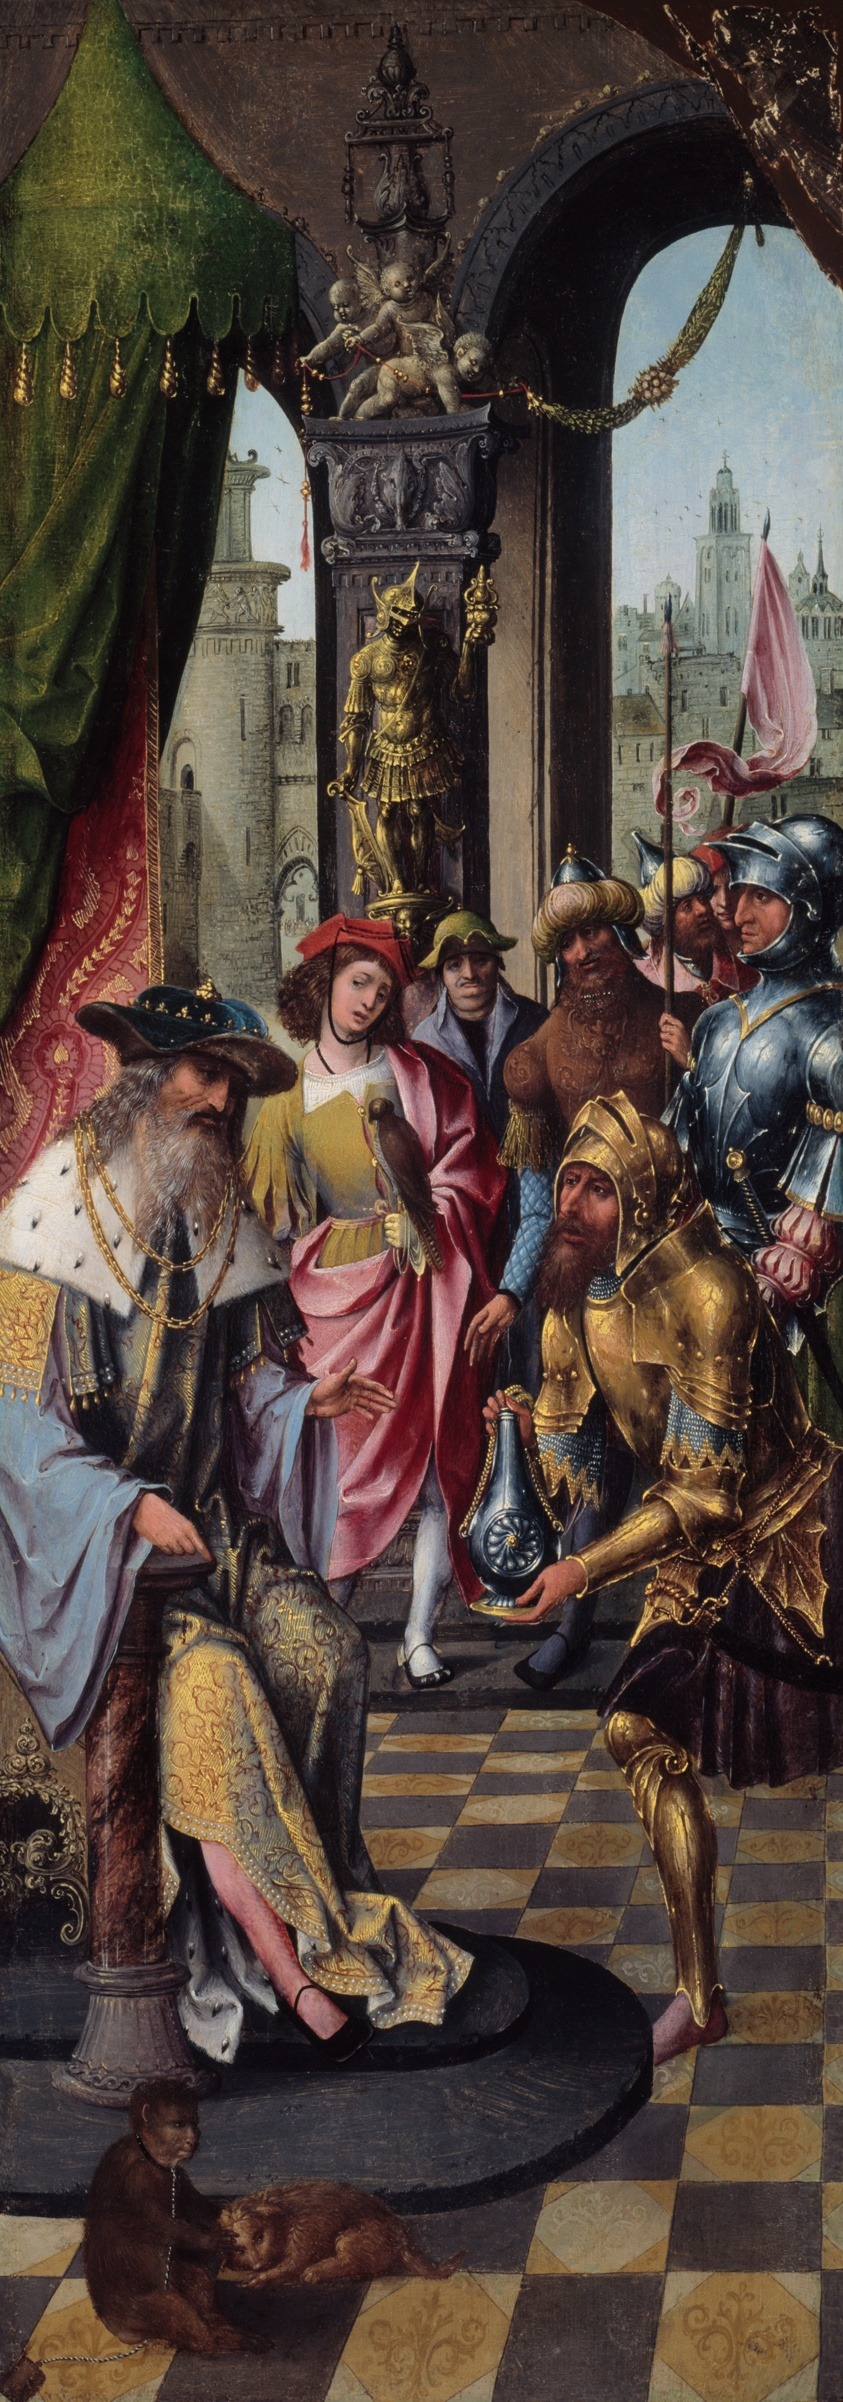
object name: Painting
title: King David Receiving the Cistern Water of Bethlehem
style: 16th Century, Renaissance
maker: Master of the Antwerp Adoration Group (Netherlandish, active c. 1520)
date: 1515–20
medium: Oil on panel transferred to canvas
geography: Belgium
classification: oil on panel; oil; oil on canvas; painting; european painting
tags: religious, religious scenes, religious figures, kings, king, Christianity, Christian subjects, religion